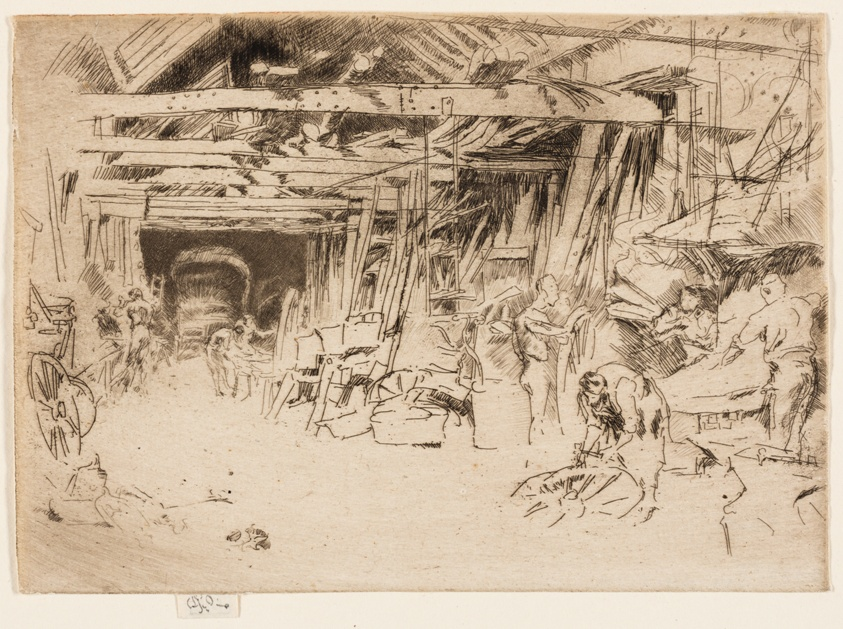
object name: Print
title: Wheelwright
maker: James McNeill Whistler (American, 1834-1903)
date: 1880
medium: Etching and drypoint with foul biting in black ink on ivory laid paper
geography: United States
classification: etching; foul biting; print; prints and drawing; drypoint; paper